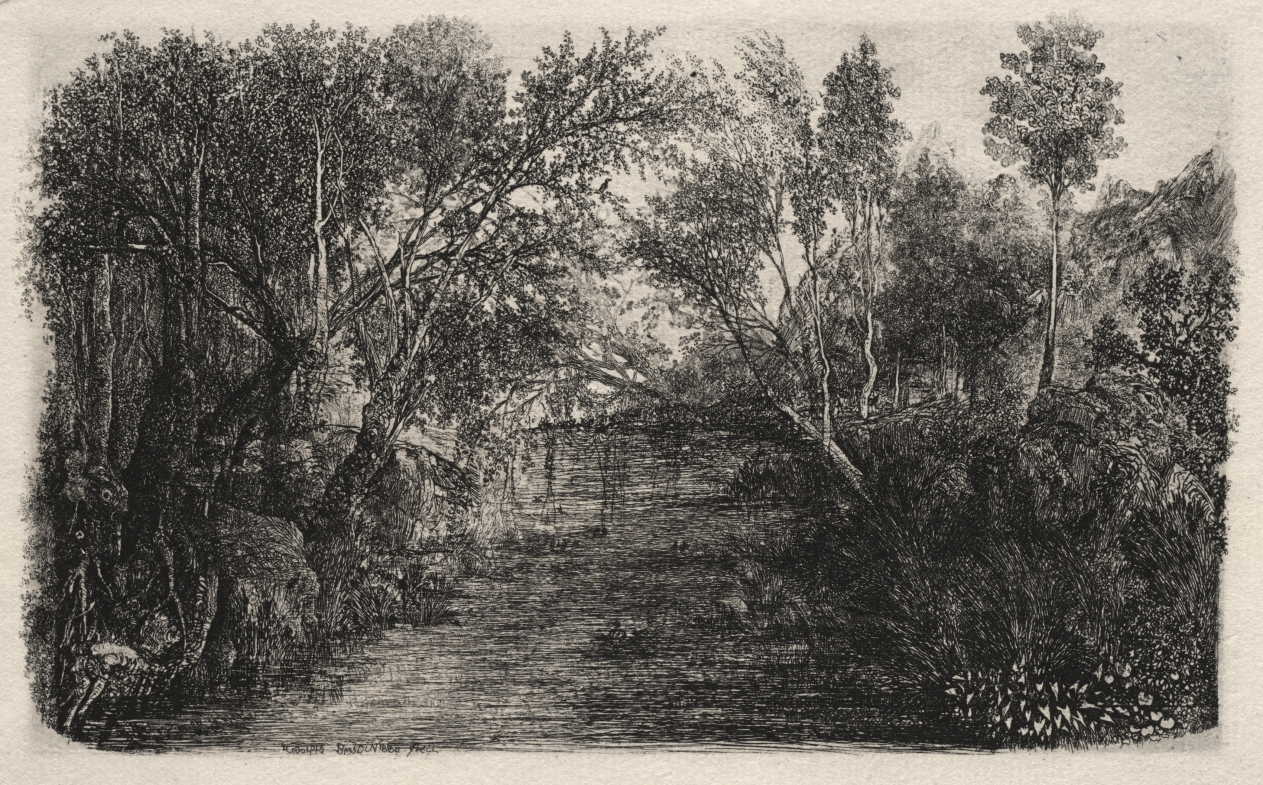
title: The Stream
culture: France, 19th century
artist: Rodolphe Bresdin (French, 1822–1885)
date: 1880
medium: etching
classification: Print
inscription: lower left, in plate: RoDoLphe BresDiN 1880 fecit (the 'e's are reversed)